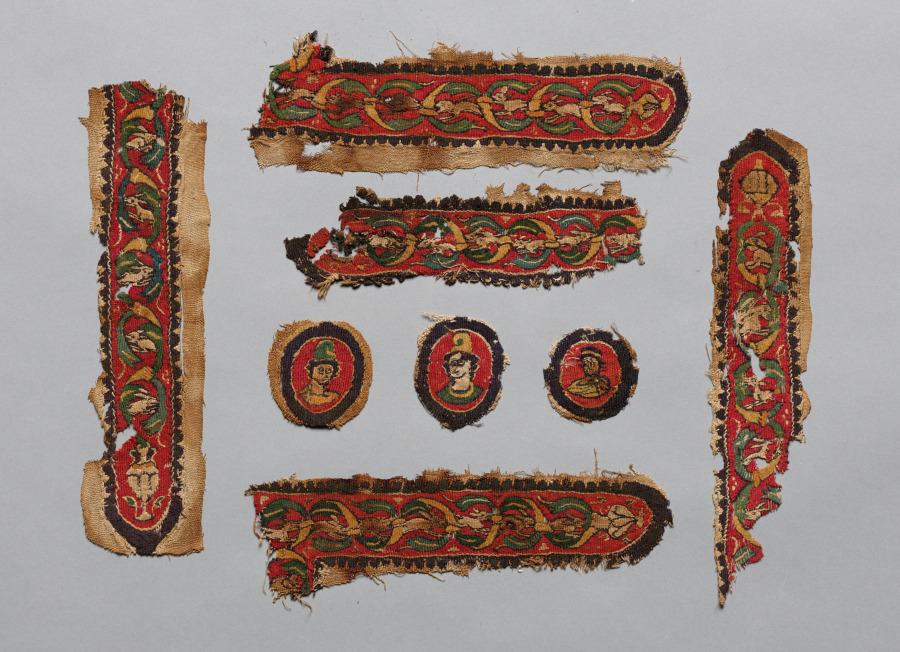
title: Fragments from a Tunic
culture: Egypt, 6th - 16th century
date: 500s - 1500s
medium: tabby weave with inwoven tapestry ornament, linen and wool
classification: Textile